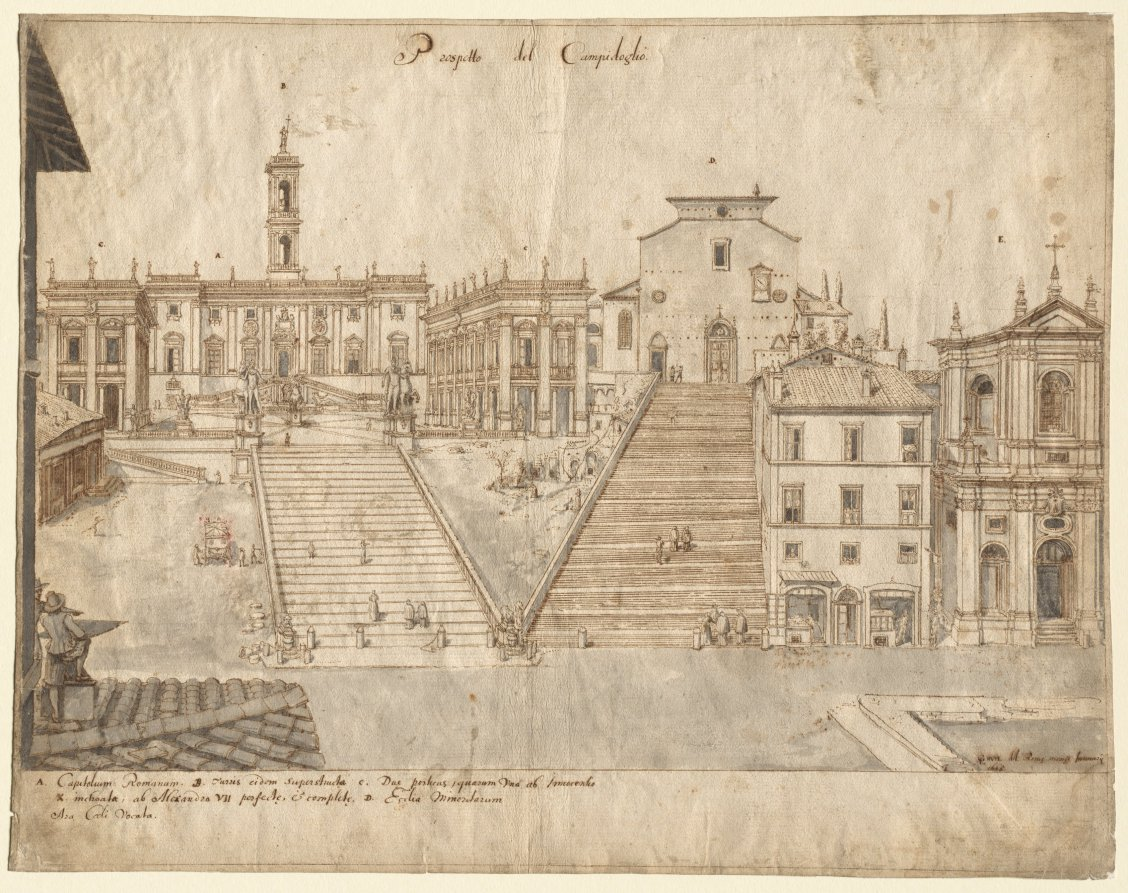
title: Eighteen Views of Rome: The Campidoglio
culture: Flanders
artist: Lievin Cruyl (Flemish, c. 1640-c. 1720)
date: 1665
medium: pen and brown ink and brush and gray wash over graphite; framing lines in brown ink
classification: Drawing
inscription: signed, lower right, in brown ink: [artist's monogram: LC] RVYL del: Romæ mense Januarij / 1665. ; by artist, upper center, in brown ink: Prospetto del Campidoglio ; by artist, throughout composition, in brown ink: [the letters A-E] ; by artist, lower left, in brown ink: A. Capitolium Romanum. B. Turris eidem superstructa. C. Due Porticus, quarum Una ab Innocentio / X. inchoatæ, ab Alexandro VII perfectæ et completæ. D. Ecclia Minoritarum / Ara Coeli Vocata. ; VERSO, upper left, in brown ink: S45.[partially masked] ; upper left in graphite: n. 545 ; ON STRIPS OF PAPER MOUNTED TO VERSO, lower center, in graphite: A20970 ; lower right, in graphite: E. 10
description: Flemish artist Lieven Cruyl made a number of drawings of emblematic vistas of Rome for the Roman publisher Giovanni Battista de Rossi, of which ten were published as etchings in 1666. The Campidoglio features architecture designed by Michelangelo. The Campidoglio was an important ritual space atop the Capitoline Hill overlooking the Roman Forum. Michelangelo reoriented the piazza to look away from the forum and toward Saint Peter’s Basilica, creating a link between the civic buildings on the piazza and the home of the Catholic Church. He had the piazza paved in a trapezoidal shape and placed the ancient Equestrian Statue of Marcus Aurelius on a newly designed plinth in the middle. With this design, he transformed the Campidoglio from a muddy hill to a central destination and ritual space for centuries to come.